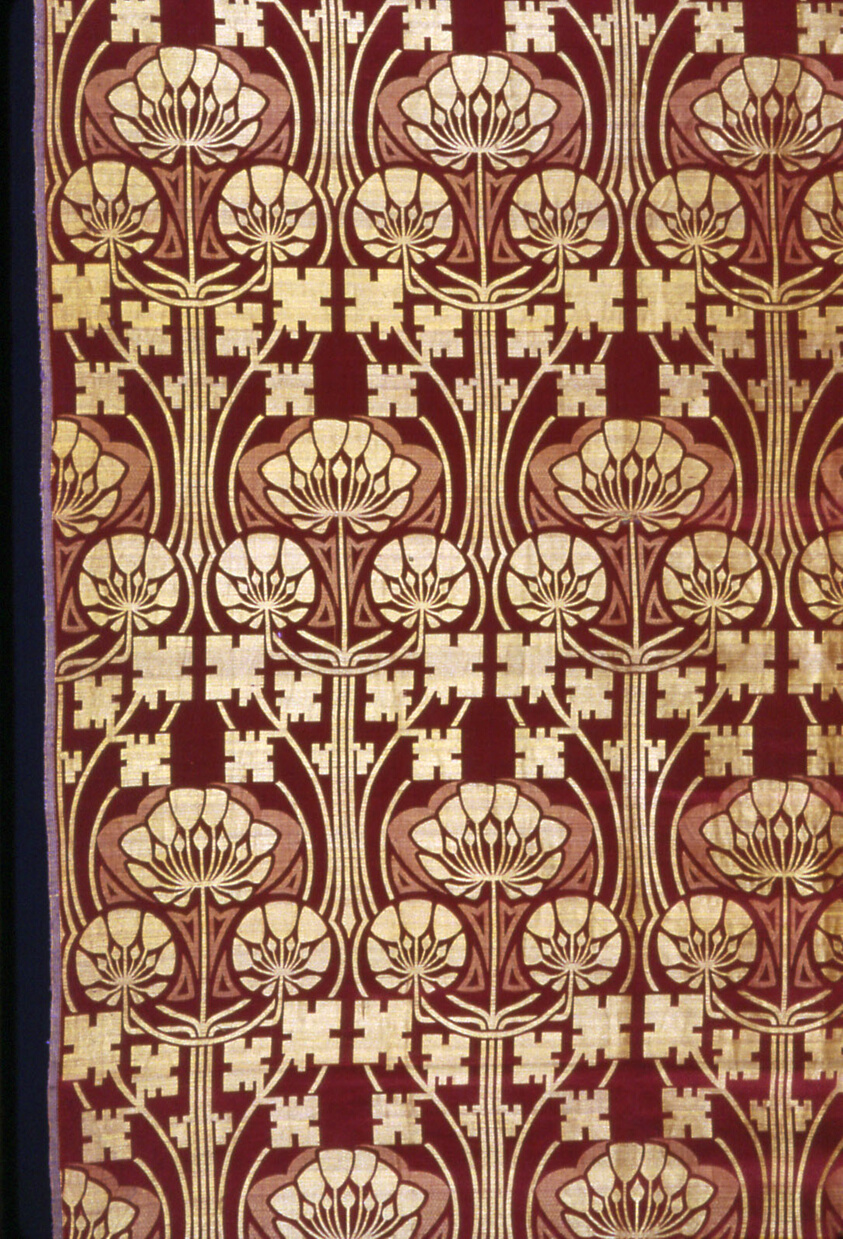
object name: Textile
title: Panel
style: Art Nouveau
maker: Designed by René Beauclair (French, active c. 1910); France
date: c. 1900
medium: Silk, wild silk, and linen, satin weave with patterning wefts bound in twill interlacings; woven on loom with Jacquard attachment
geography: France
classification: textile; weaving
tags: flowers